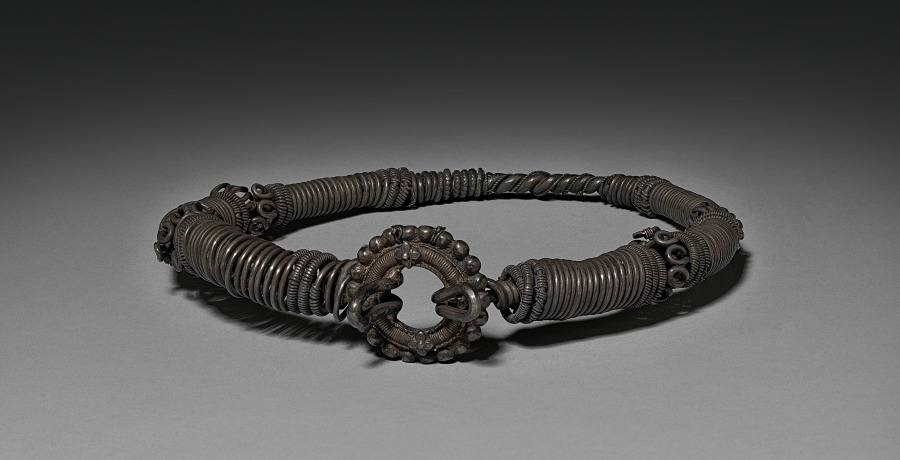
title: Necklet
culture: Burma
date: 1800s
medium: silver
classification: Jewelry